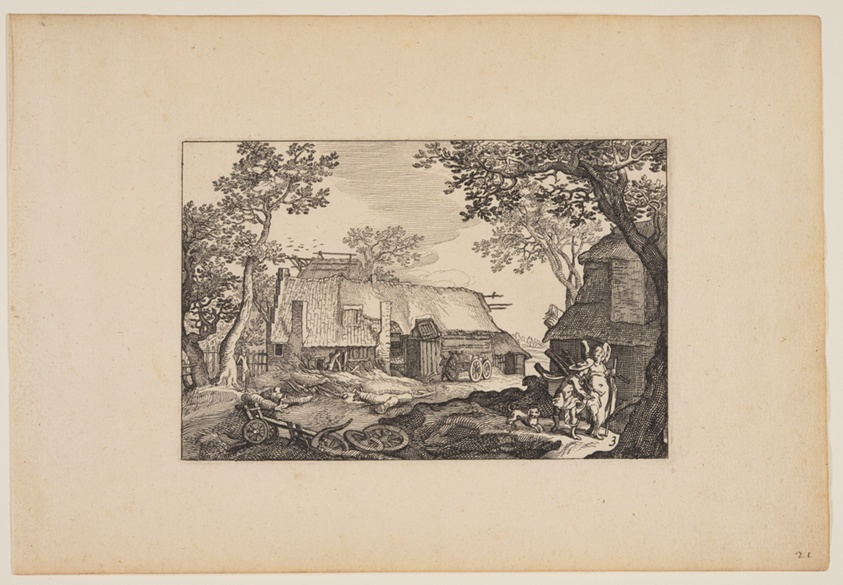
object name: Print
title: Tobias and the Angel, from Landscapes (Verscheyden aerdige Lanthuysen...)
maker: Claes Jansz. Visscher (Netherlandish, c. 1550–c. 1612); after Abraham Bloemaert (Dutch, 1566–1651)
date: 1620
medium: Etching on ivory laid paper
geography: Netherlands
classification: print; paper; prints and drawing; etching